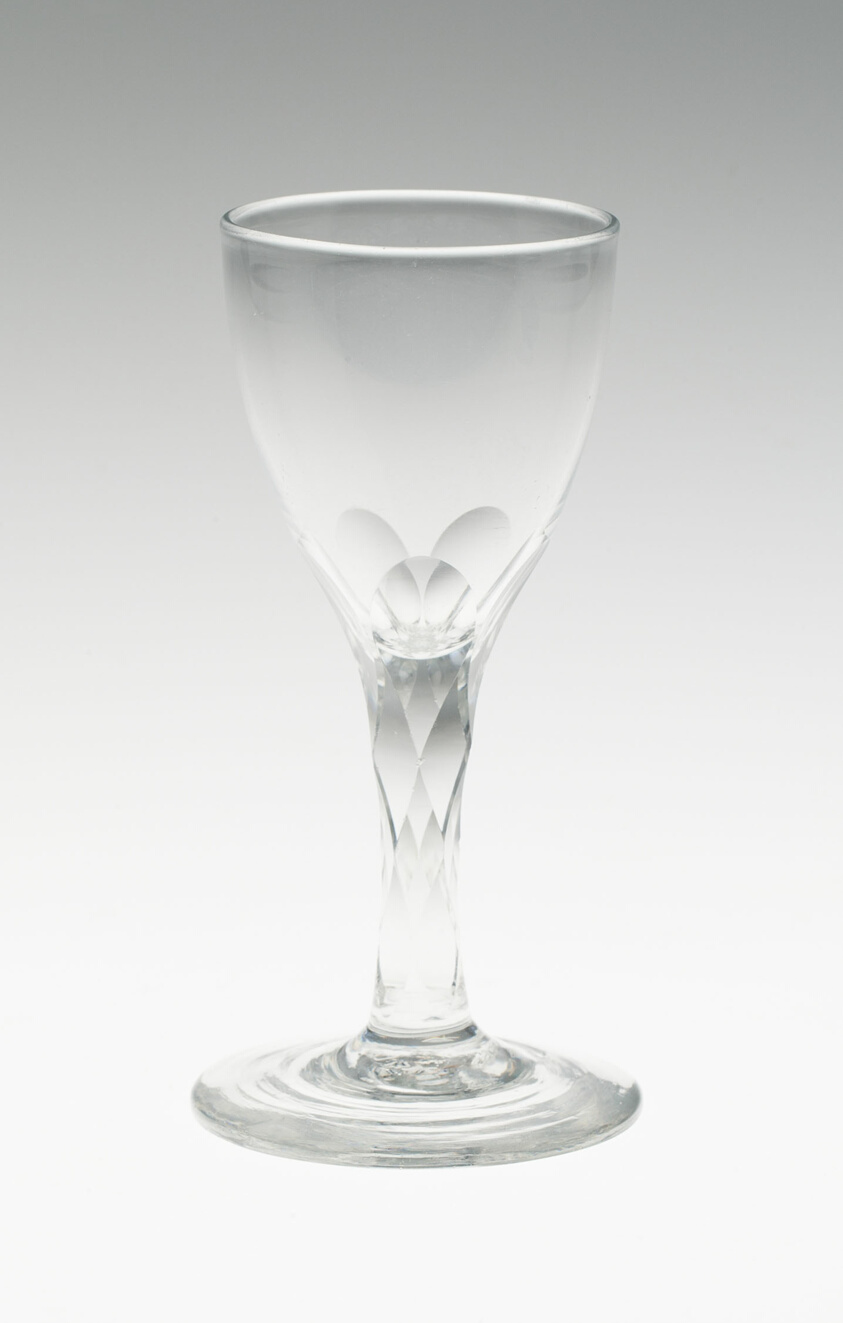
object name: Glass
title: Wine Glass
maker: England or Netherlands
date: c. 1775/99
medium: Glass; cut and stipple engraved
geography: England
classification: drinking vessel; glass; european decorative arts